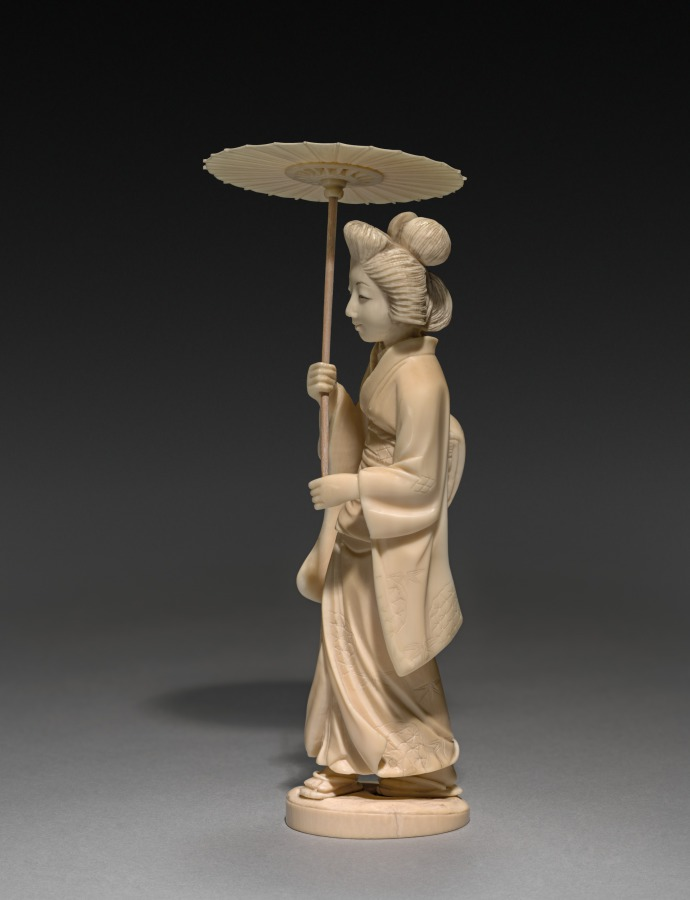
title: Woman Carrying a Parasol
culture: Japan, Meiji period (1868–1912)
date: Late 1800s- Early 1900s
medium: ivory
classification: Ivory